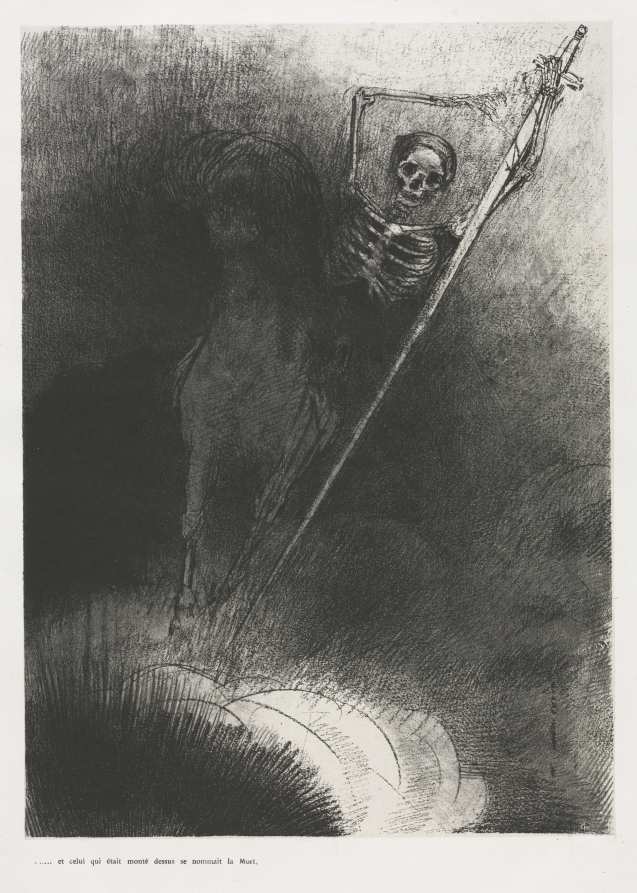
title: And His Name That Sat on Him Was Death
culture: France, late 19th Century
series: The Apocalypse of Saint John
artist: Odilon Redon (French, 1840–1916)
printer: Blanchard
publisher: Ambroise Vollard (French, 1867–1939)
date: 1899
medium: lithograph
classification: Print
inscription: Initialed in stone at lower right: OR; printed at lower left, below image: ......et celui qui était monté dessus se nommait la Mort,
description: The last of Odilon Redon’s 11 lithographic portfolios, this series relates to the Book of Revelation from the Christian Bible. The subject had been explored throughout art history, allowing the artist to align himself with past masters, such as Albrecht Dürer. Although Redon often vaguely referenced texts, these prints directly illustrate 12 individual passages, including one about a woman clothed with the sun and another focused on a great star falling from heaven. By the time he created this portfolio, Redon’s reputation was well established. The project was published by art dealer Ambroise Vollard, who began to sell and promote Redon’s work about a year earlier, building a market for his prints in Paris and abroad.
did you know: This is one of the last works where Redon experimented with lithograph and all-black medium. In contrast, bright, dazzling colors characterize his late works.